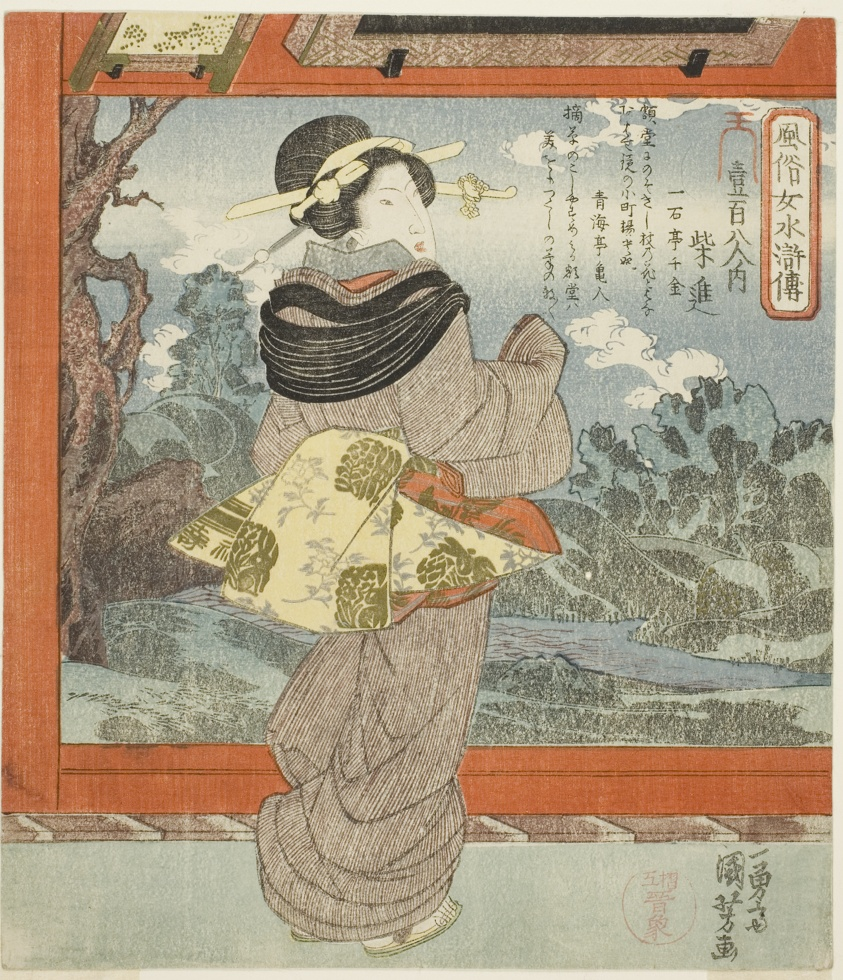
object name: Print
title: Saishin, from the series "Fashionable Women as the One Hundred and Eight Heroes of the Water Margin (Fuzoku onna Suikoden, ippyakuhachinin no uchi)"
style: Japanese (culture or style)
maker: Utagawa Kuniyoshi (Japanese, 1797-1861)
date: c. 1828/30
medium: Color woodblock print; surimono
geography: Japan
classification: woodblock print; print; asian art